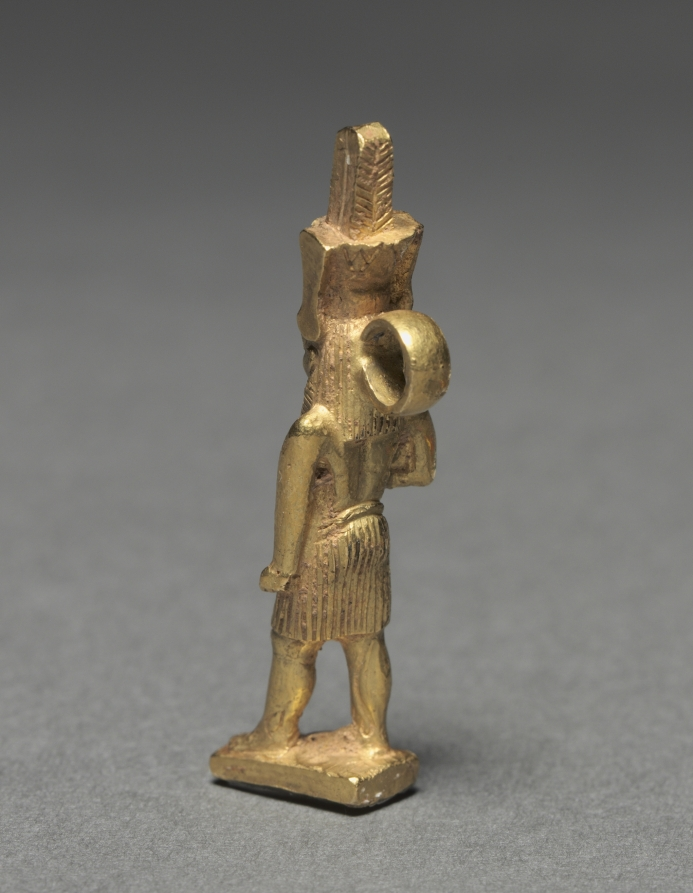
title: Nefertem Amulet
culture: Syro-Phoenicia, Lebanon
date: c. 500 BCE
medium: gold, lost-wax, solid cast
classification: Jewelry